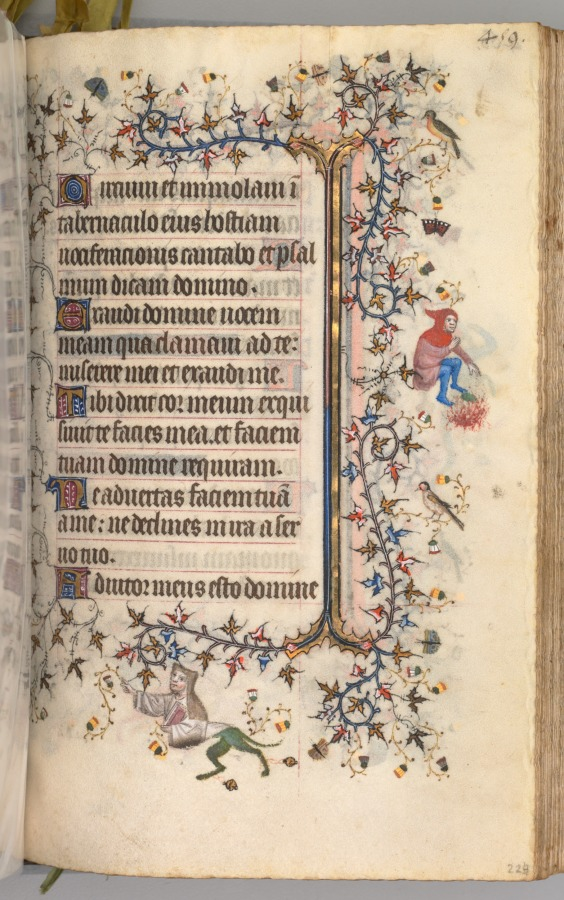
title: Hours of Charles the Noble, King of Navarre (1361-1425): fol. 224r, Text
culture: France, Paris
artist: Master of the Brussels Initials and Associates (French)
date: c. 1405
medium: ink, tempera, and gold on vellum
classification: Bound Volume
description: This precious volume was obviously highly prized by its owner, the French-born King of Navarre, who had his coat of arms painted on no less than twenty folios. Rather than directly commissioning this manuscript from a specific workshop, it seems that Charles the Noble acquired his book of hours -- perhaps ready-made for the luxury market -- while on a trip to Paris in 1404-05. A collaborative effort, six painting styles are evidenced within the pages of this codex, those of two Italians, two Frenchmen, and two Netherlanders. The painter who was responsible for the planning and decoration of the book, and who produced seventeen of the large miniatures, was a Bolognese artist known as the Master of the Brussels Initials. His principal assistant, responsible for most of the borders, was a Florentine who signed his name "Zecho" da Firenze on folio 208 verso.